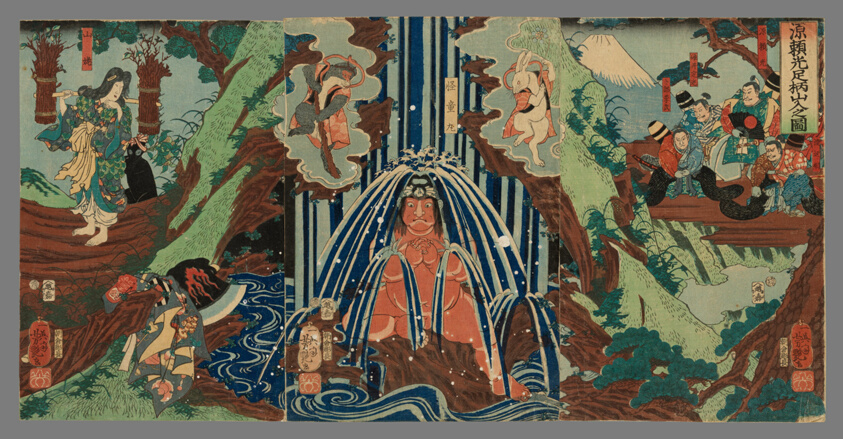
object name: Print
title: Minamoto Yorimitsu in Mount Ashigara (Minomoto Yorimitsu Ashigarayama iri no zu)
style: Japanese (culture or style)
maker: Ichieisai Yoshitsuya (Japanese, 1822-1866)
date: 1861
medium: Color woodblock print; oban triptych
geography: Japan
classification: woodblock print; print